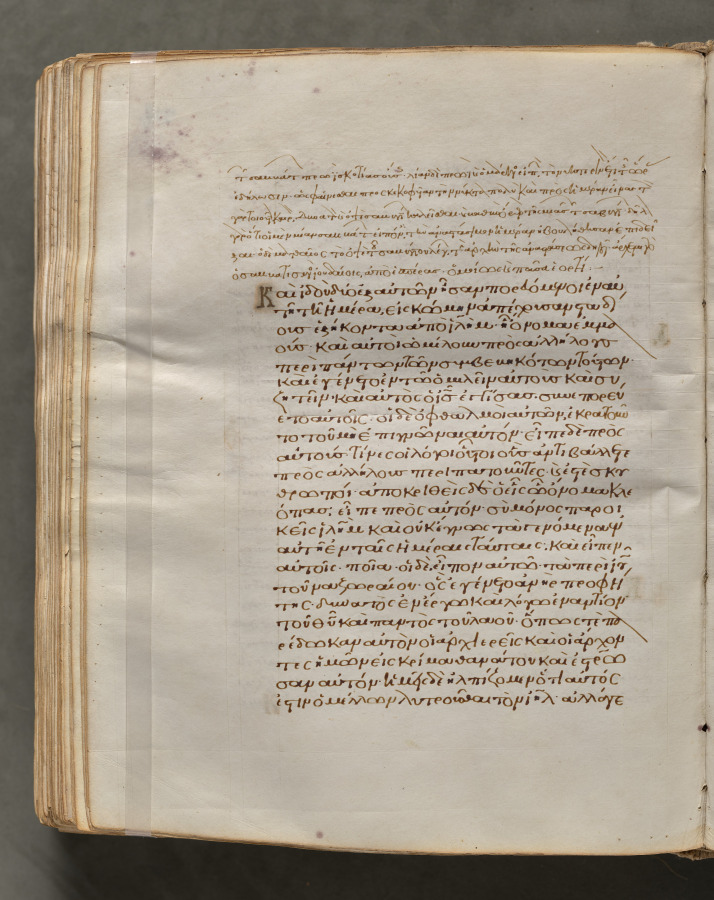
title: Text, folio 319 (verso), from a Gospel Book with Commentaries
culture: Byzantium, Constantinople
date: c. 1000–1100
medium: ink, tempera, and gold on vellum; leather binding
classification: Bound Volume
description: Each of the four gospels in this book opens on a page with brilliantly illuminated borders depicting the author of the text as well as birds—principally peacocks, symbols of the immortality of the soul—and fountains, representing the fountain of life and the salvation of the soul. This volume consists of 428 leaves with texts in Greek. Its level of sophistication suggests that it was probably written and decorated in a monastery in Constantinople.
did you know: Gospel books were carried in procession through Byzantine churches.